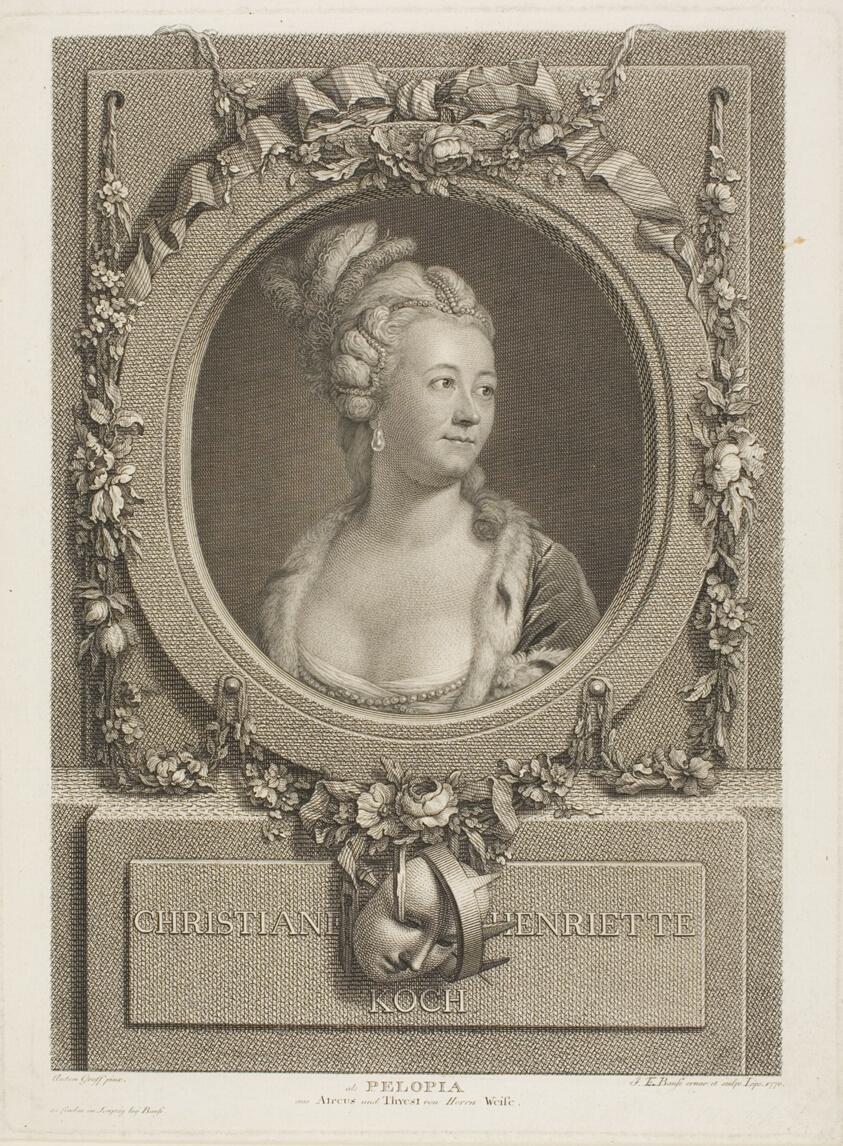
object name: Print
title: Christiane Henriette Koch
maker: Johann Friedrich Bause (German, 1738-1814); after Anton Graff (German, born Switzerland, 1736-1813)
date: 1770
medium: Engraving on paper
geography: Germany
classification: engraving; print; prints and drawing